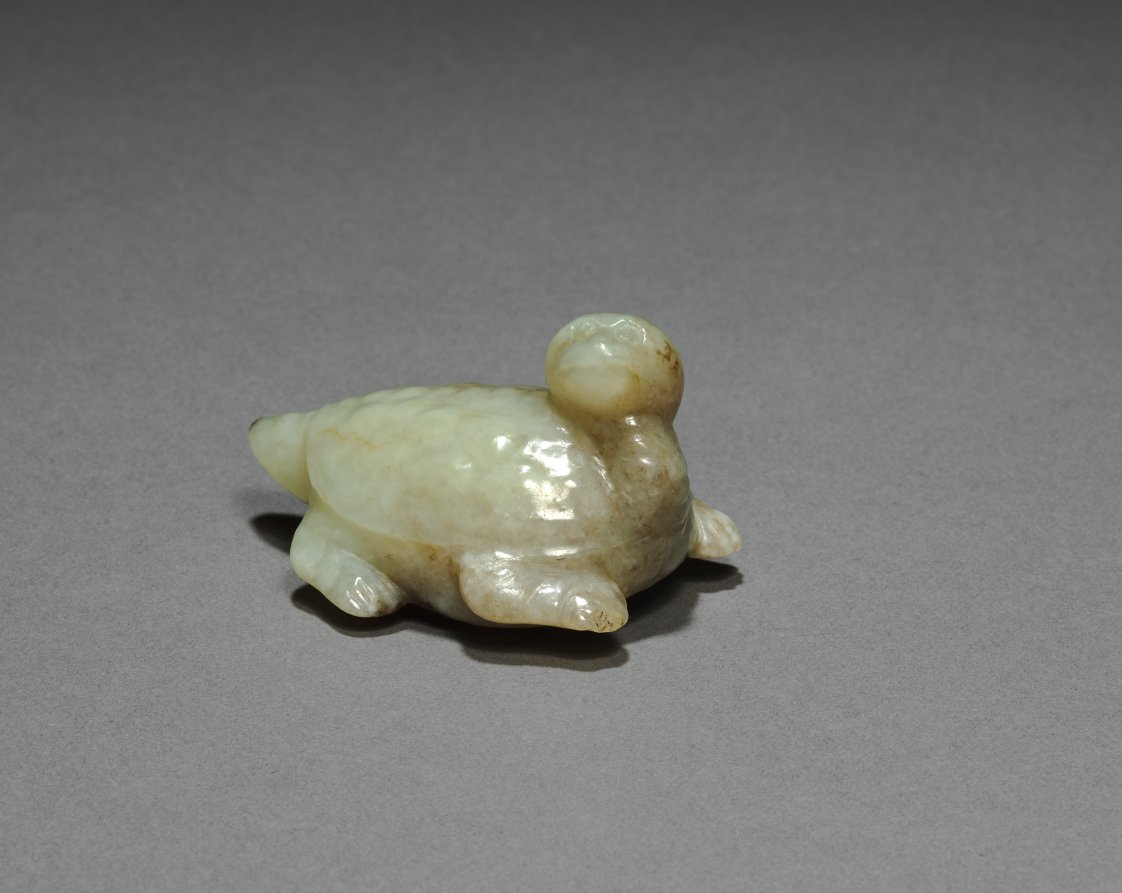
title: Tortoise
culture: China, Ming dynasty (1368–1644)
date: 1368–1644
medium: yellowish green jade with brown markings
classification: Jade